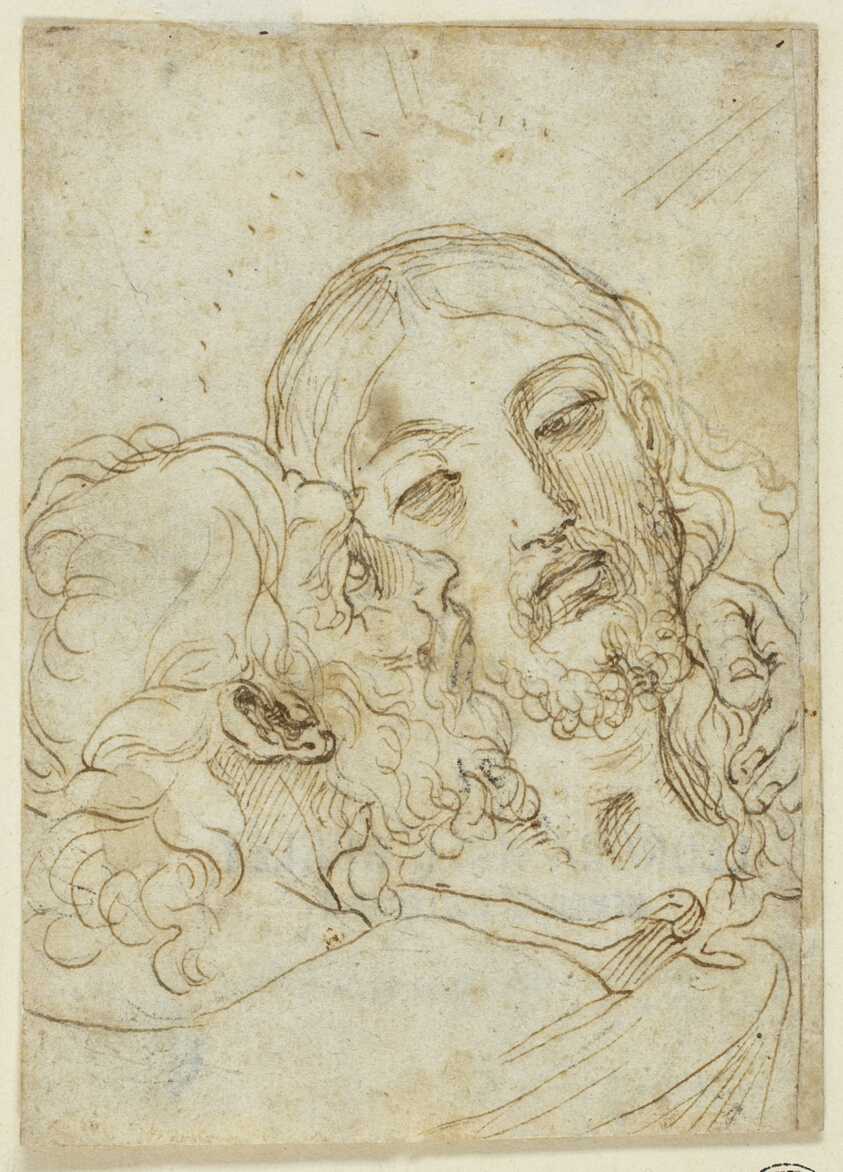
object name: Drawing and Watercolor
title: Kiss of Judas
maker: Attributed to Ludovico Carracci; Italian, 1555-1619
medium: Pen and brown ink, with traces of black chalk, on ivory laid paper, tipped onto cream wove paper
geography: Italy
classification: pen and ink drawings; drawings (visual works); prints and drawing